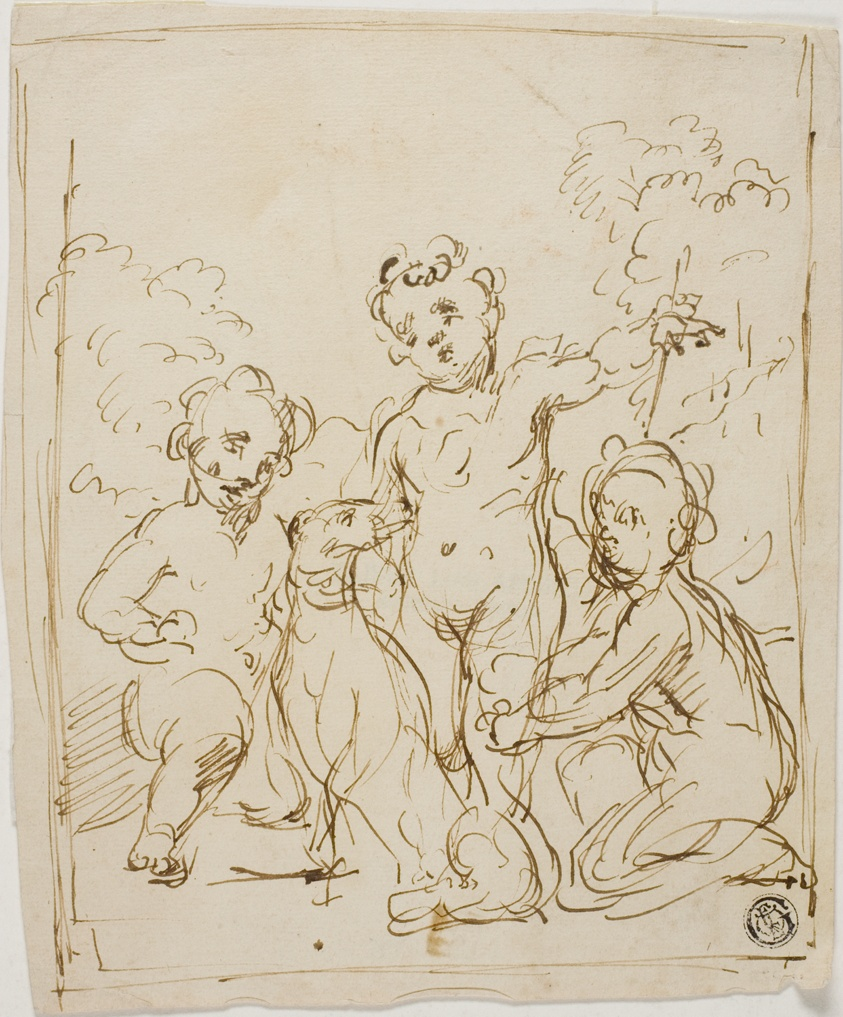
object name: Drawing and Watercolor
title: Three Putti and Dog in a Landscape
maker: Attributed to Giuseppe Diamantini; Italian, 1621-1705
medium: Pen and brown ink on tan laid paper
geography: Italy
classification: pen and ink drawings; drawings (visual works); prints and drawing